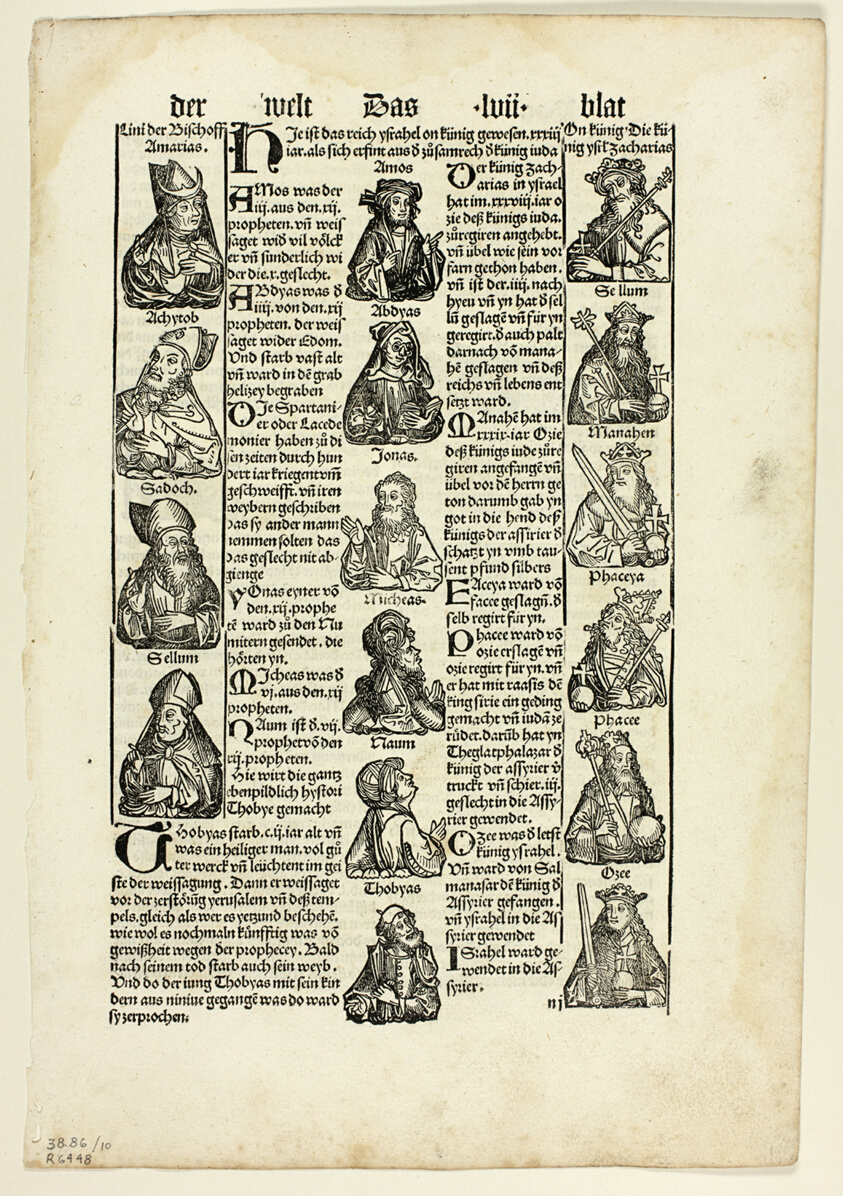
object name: Print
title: Bishops, Prophets, and Kings from Schedel Weltchronik (Schedel's World History), Plate 10 from Woodcuts from Books of the 15th Century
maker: Unknown Artist (Augsburg, 15th century); printed and published by Johann Schönsperger the Elder (German, c. 1455–1521); original text by Hartmann Schedel (German, 1440–1514); portfolio text by Wilhelm Ludwig Schreiber (German, 1855–1932)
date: 1496, portfolio assembled 1929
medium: Woodcut and letterpress in black (recto and verso) on cream laid paper, tipped onto cream wove paper mat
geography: Germany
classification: woodcut; print; prints and drawing